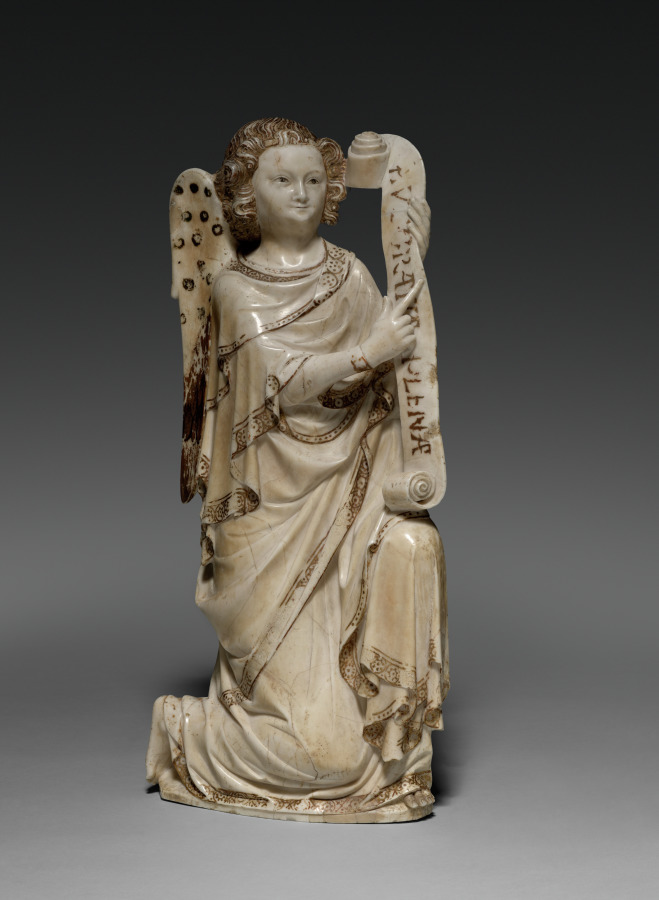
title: The Archangel Gabriel from an Annunciation Group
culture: France, Champagne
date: c. 1350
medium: alabaster with traces of paint and gilding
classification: Sculpture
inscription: Ave Maria, Gratia Plena.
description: In France, the use of alabaster began in the late 1200s for funerary monuments. The Archangel Gabriel, together with its counterpart, the Virgin Mary (now in the Louvre Museum, Paris) is part of an Annunciation. This is a rare example of alabaster sculpture from the 1300s. The alabaster comes from a quarry near Malaucène in Provence (France), making it an instance of long-distance trade of the rare material. Although the figure is very flat, it was likely made to also be viewed from the back, where there are remnants of gilding and the peacock feathers of the angel’s wing.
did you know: The surface of alabaster works can vary. By differentiating the intensity of polishing, it is possible for sculptures to create a surface with varying degrees of luster, or shine.